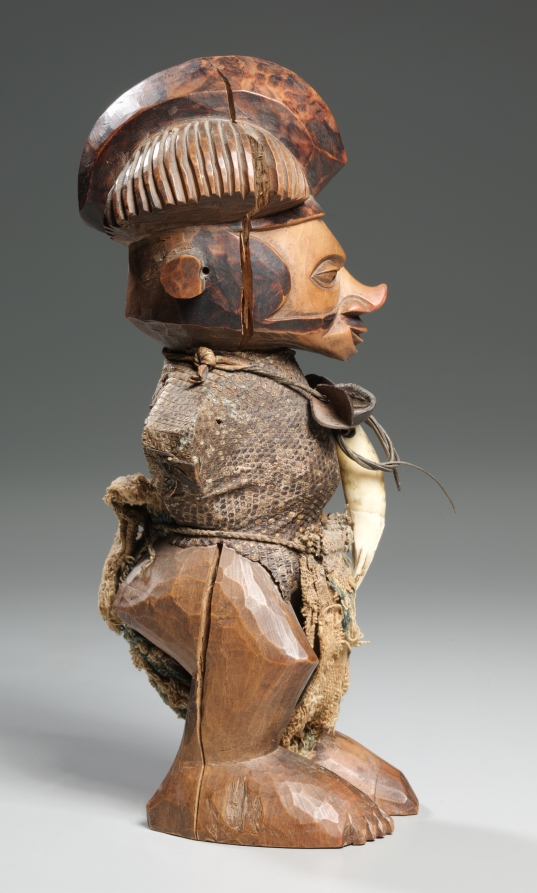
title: Figure (kiteki)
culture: Africa, Central Africa, Democratic Republic of Congo, Yaka-style carver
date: late 1800s–mid-1900s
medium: Wood, lizard skin, leopard tooth, pods, cloth, and natural fiber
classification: Sculpture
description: Biteki is the generic name for Yaka figures used as containers for magical ingredients. After being charged by a ritual specialist, they become minkisi, or power objects, and gain the power to either cure or harm. This example, with various leadership accouterments, likely belongs to the category called phuungu. Placed inside a house, the statuette would have protected against witches and other evil.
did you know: The sculptures and the specially selected materials inside assist the prayers of owners for protection from harm, sickness, or loss.